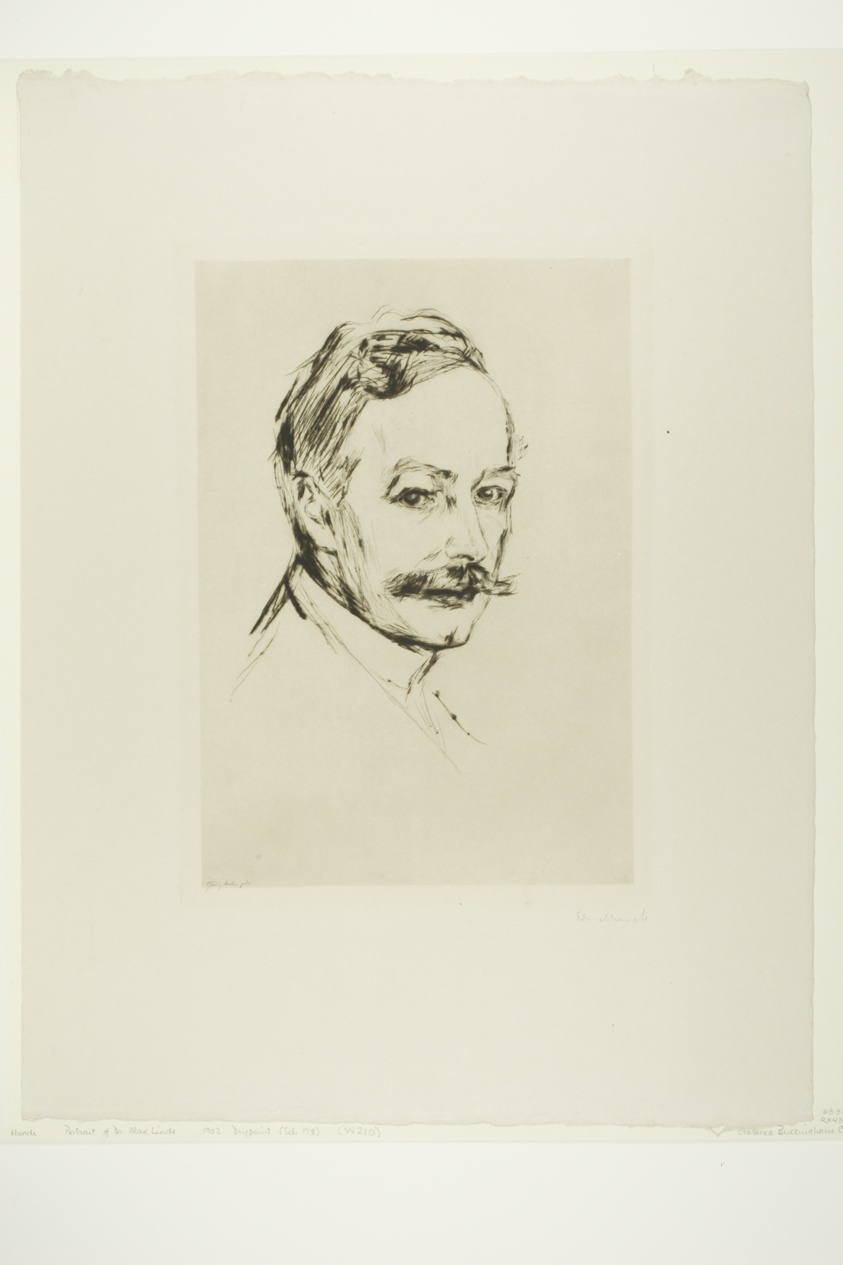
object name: Print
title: Dr. Max Linde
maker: Edvard Munch (Norwegian, 1863-1944); printed by Otto Felsing (German, born 1854)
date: 1902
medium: Drypoint on buff wove paper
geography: Norway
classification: drypoint; print; prints and drawing